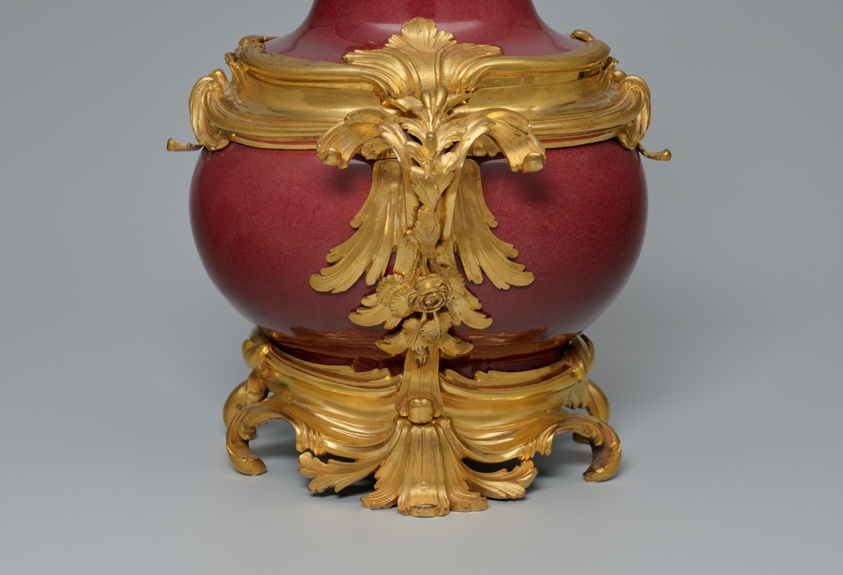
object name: Ceramics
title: Pair of Mounted Vases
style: Rococo, 18th Century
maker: China; Mounts attributed to Jean-Claude Duplessis (French, c. 1695–1774)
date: c. 1750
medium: Hard paste porcelain and gilt bronze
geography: China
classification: vase; france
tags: ormolu, China, foliage